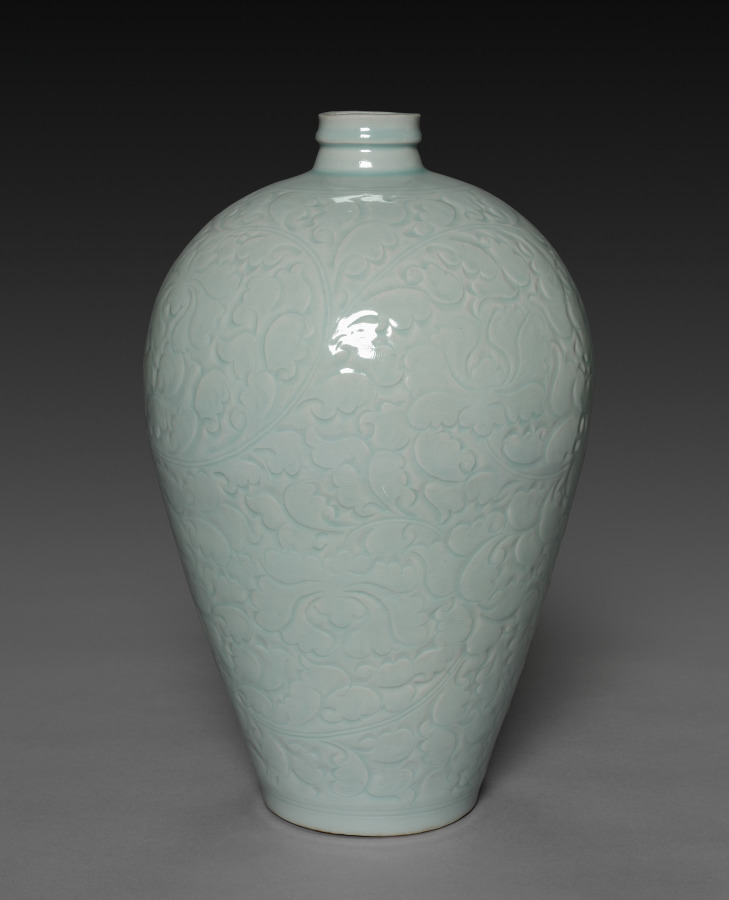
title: Meiping Vase with Carved Floral Sprays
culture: China, Song dynasty (960–1279)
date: 960–1279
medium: Porcelain with pale bluish-white glaze, qingbai ("blue-white") ware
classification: Ceramic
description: This magnificent plum vase (meiping) derives its name from being used to hold a branch from a flowering plum tree. Vases of this shape with a round shoulder and narrow opening originally served as wine containers. Kilns in southern China that produced this ware with a transparent bluish glaze were among the first that applied underglaze blue-and-white decoration, which became popular during the Yuan (1271–1368) and Ming (1368–1644) dynasties. These elegantly carved floral sprays on a monochromatic ground reflect the refined taste of the Song dynasty emperors.